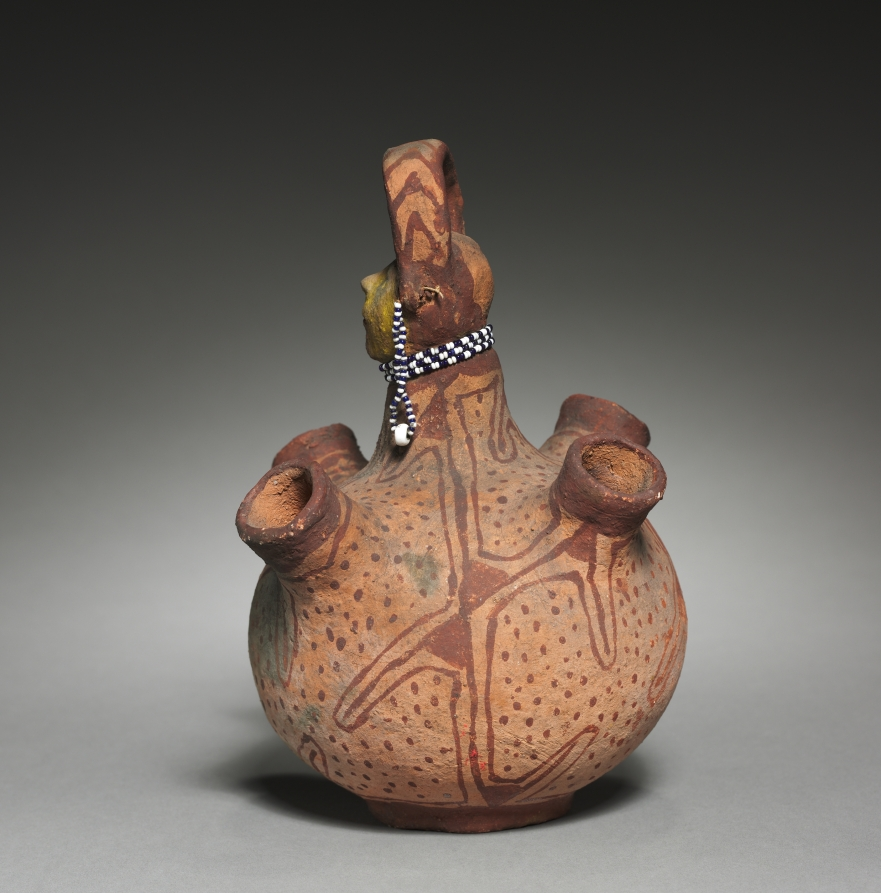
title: Vessel with Four Spouts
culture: Great Basin, Pueblo, Mojave, Post-Contact Period, early 19th century?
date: early 1800s?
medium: ceramic, pigment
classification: Ceramic